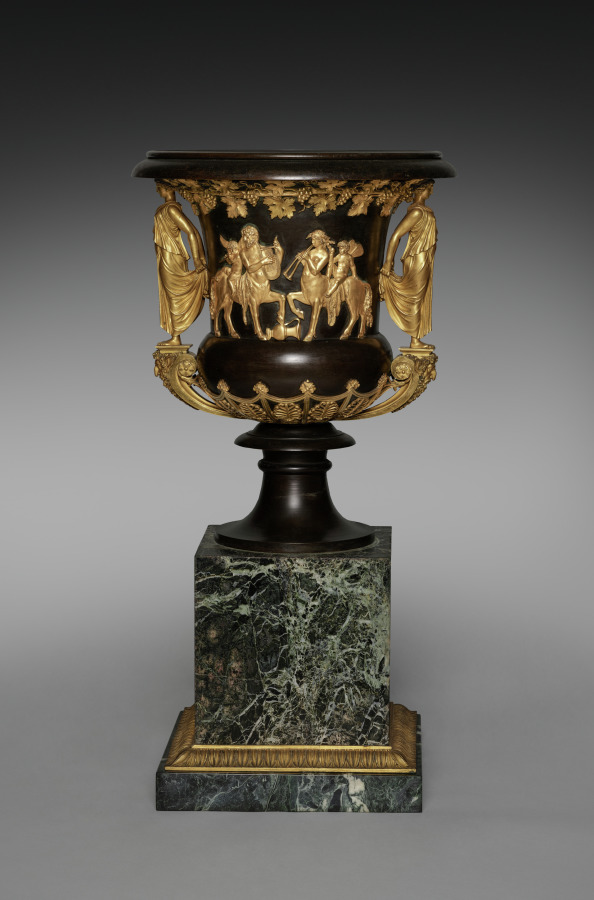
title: Vase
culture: France, late 18th-early 19th Century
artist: attributed to Pierre Philippe Thomire (French, 1751–1843)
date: c. 1800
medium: bronze, partially gilt, marble base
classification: Metalwork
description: In 1798, a large quantity of French furnishings was acquired for the Michael Palace in St. Petersburg, Russia. Some of these pieces survive in museums like the Hermitage Museum in St. Petersburg. This institution recently staged an exhibition of such French pieces by and attributed to Thomire. Among the objects shown was a bronze vase virtually identical in design to this piece. The body of this vase is decorated with two small reliefs showing male and female centaurs with putti riding on their backs. These reliefs also occur on silver wine coolers produced by the Odiot firm, a major Parisian silversmith under Napoleon's empire. The Odiot firm still owns models of these reliefs that, according to tradition, had been given to Jean-Baptiste Claude Odiot by Thomire.